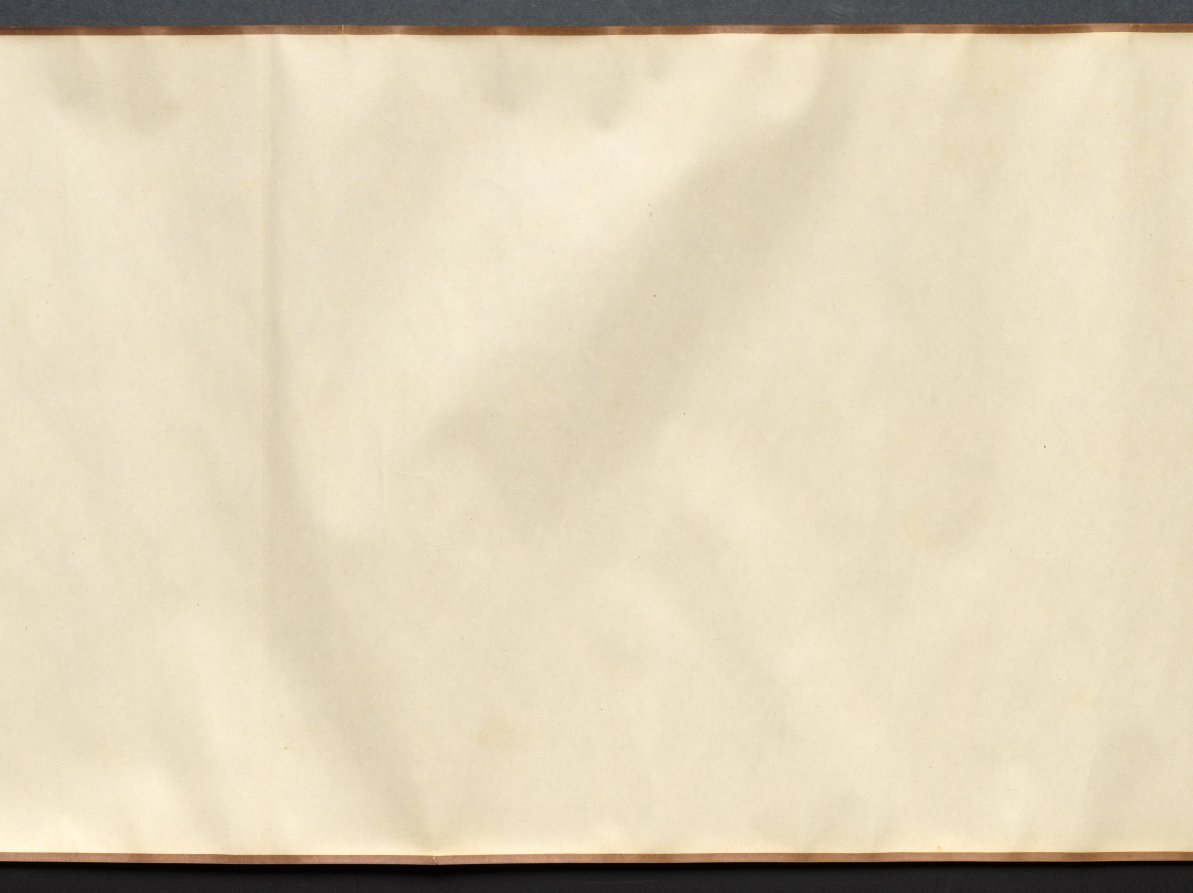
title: Returning to the Village in a Rainstorm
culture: China, Ming dynasty (1368–1644)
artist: Xie Shichen (Chinese, 1487–after 1567)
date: 1530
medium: Handscroll; ink and light color on silk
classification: Painting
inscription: 風雨歸村圖 嘉靖庚寅秋日樗仙謝時臣. [印] 謝時臣印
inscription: 3 additional seals unidentified.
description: This scroll depicts a wind- and rainswept landscape with figures in the countryside struggling against a late summer monsoon rainstorm. Such weather was familiar to residents of the lower Yangzi delta. Xie Shichen spent most of his life in the Suzhou area. Details of his career are scant, but his surviving works suggest that he made his living as a professional painter. This painting conveys drama and anecdotal observations, characteristic of Zhe school paintings, such as the one by Lü Wenying, CMA 1970.76.